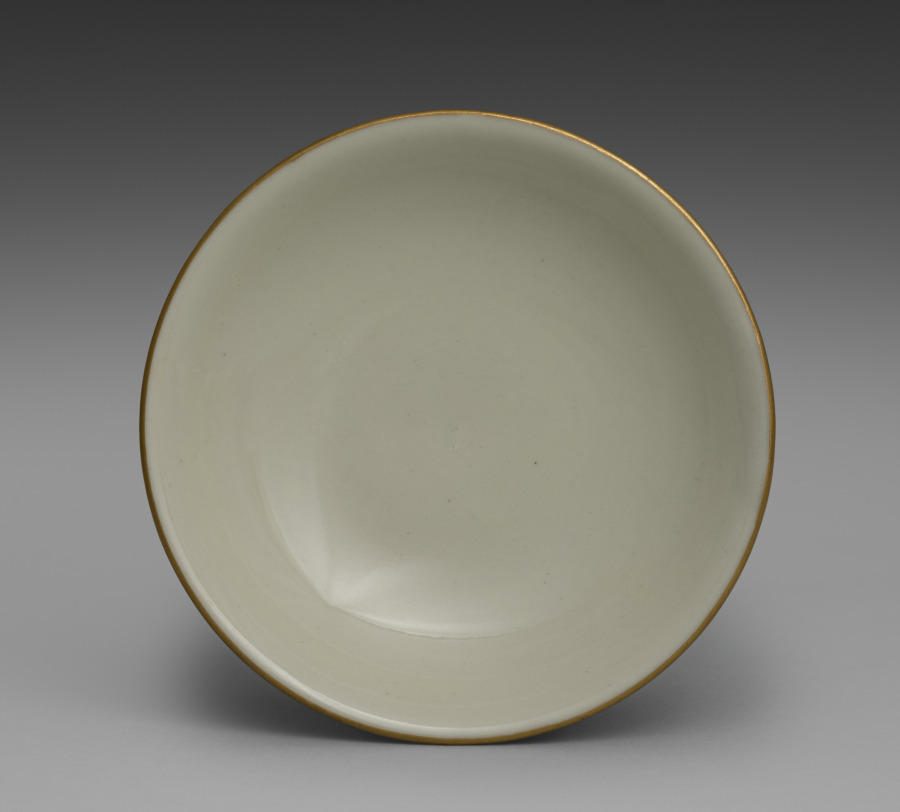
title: Cover for a Bowl from Dining Set with Plum Blossoms and Cracked-Ice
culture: Japan, Meiji period (1868–1912)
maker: Seifū Yohei II (Japanese, 1844–1878)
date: c. 1875–78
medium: Porcelain with molded designs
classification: Ceramic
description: Each item in this set has a delicate low-relief design of flowering plum branches over scattered, intersecting lines meant to resemble the cracked-ice surface of a frozen body of water and is signed on the base in gold pigment. While Yohei II produced many fine works in underglaze blue, like those produced by Kiyomizu Shichibei, he also made works in quite different styles later in his career, from the early 1870 s. In 1873, he was appointed purveyor to the Industrial Center of Kyoto Prefecture, a designation associated with Kyoto’s efforts to reach an international market through the port of Kobe; and from 1875 until his death, he was involved in national-level projects to present Japanese ceramics across the world. It was during this period that Yohei III was apprenticed to Yohei II, and it has been suggested that this set may in fact be an early example of Yohei III’s work, which he signed with his teacher’s name. Decorated with flowers resembling Japanese textile motifs, the set calls to mind the design of Yohei II’s pair of vases with plum blossoms in the Victoria and Albert Museum. Here, the elaborate trees created for a formal public exhibition setting have been translated into the approachable blossoms of the genteel domestic environment. While the designs are consistent across the pieces, each raised flower petal and pistil and each incised line in the ice was done by hand, so the cups, bowls, and dishes are similar yet unique. The bottoms of two boxes once identified the set’s owner, but the information has been deliberately obscured with black ink. However, inscriptions still visible appear to indicate two occasions, once at the end of July 1886 , and once again in June 1916 , when parts of the set were requested from Hokura in Niigata Prefecture. The location corresponds to a neighborhood in the present-day city of Jōetsu. The surname Tsuji 辻 also appears on a paper tag affixed to one of the box cloths. Future research may possibly reveal more about their provenance. A vase by Yohei III in a private collection combines the formal grandeur of the Yohei II vases in the Victoria and Albert Museum with the gentler design of this dining set, placing flowering plum trees against soft, scalloped-edge clouds resembling those in golden screens.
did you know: The dining wares have a creamy white coloration that the four boxes containing them identify as Korean in style.